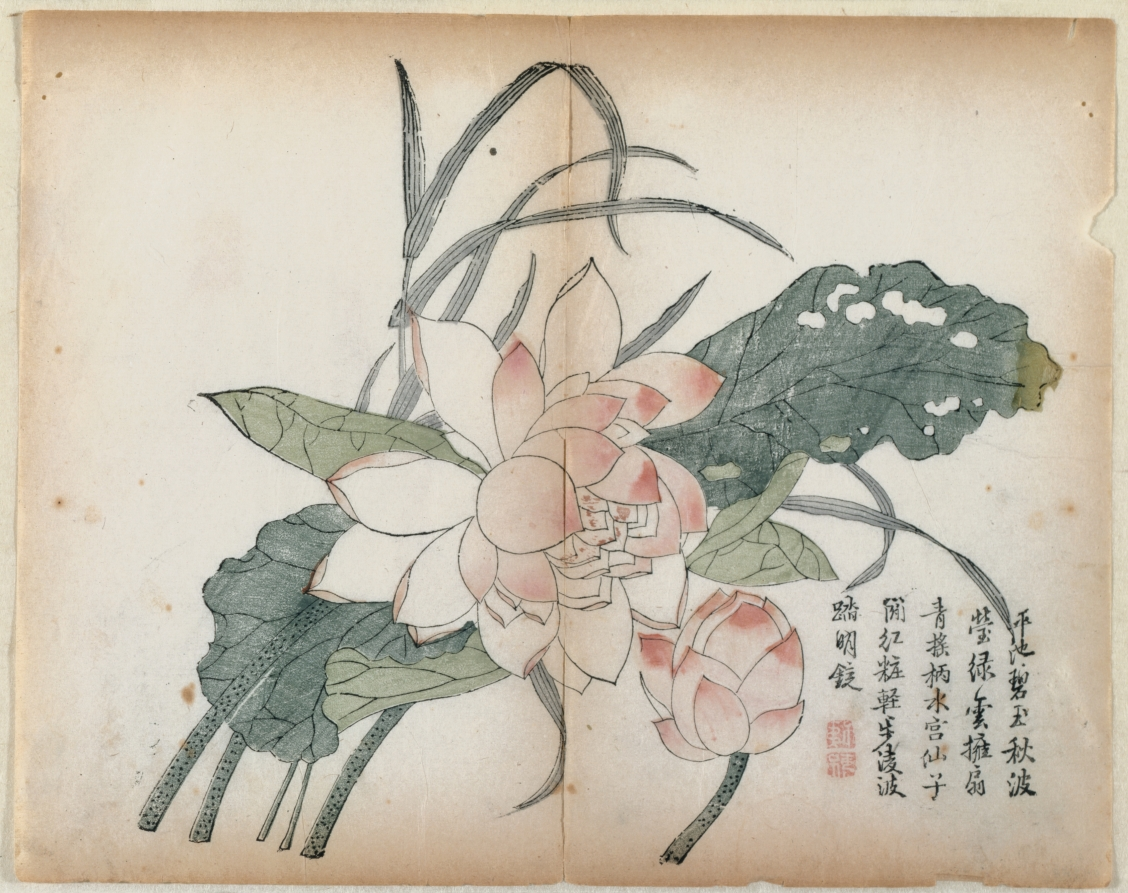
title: Flowering Lotus and Bud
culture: China, Qing dynasty (1644-1911)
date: 18th Century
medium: color woodblock print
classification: Print